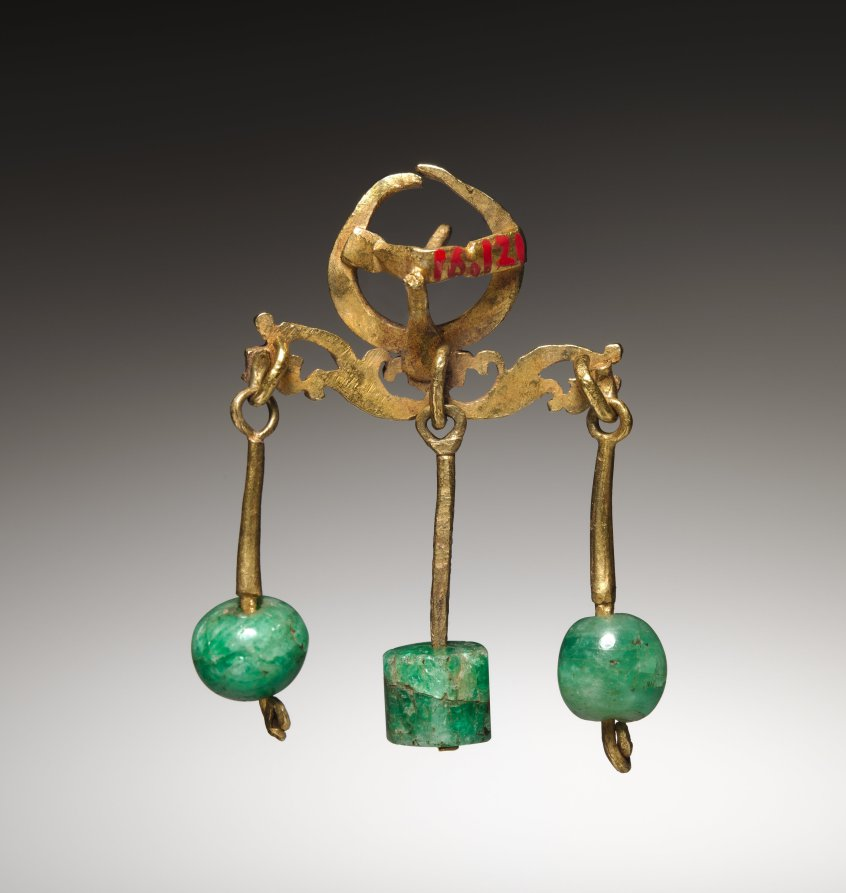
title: Earring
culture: Byzantium (style of), probably 19th-20th century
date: probably 1800s-1900s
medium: gold with jade pendants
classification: Jewelry